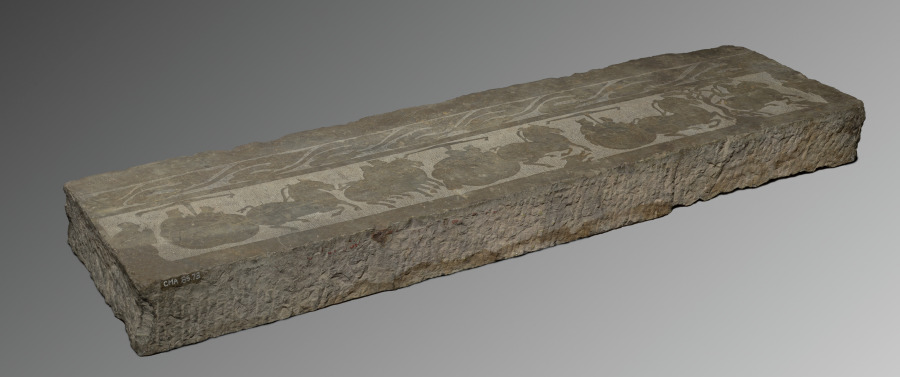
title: Frieze Fragment with Chariot Procession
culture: China, style of Wu Family Shrines, Jiaxiang district, Shandong province, Eastern Han dynasty (25–220 CE)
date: 100s CE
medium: stone carved in low relief with engraved detail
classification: Sculpture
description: The frieze shows a procession of horse-drawn chariots passing through terrain animated with wild animals and a monkey climbing a tree. The border of swirling clouds above conveys associations with heaven or the remote land of immortals in the high mountains. Comparable in style with the stone reliefs of the Wu Family shrines, this stone may have been originally carved for a local Eastern Han dynasty family tomb of similar status. To take a rubbing of the frieze, a moistened sheet of paper is laid over the slab and tamped with an ink pad that then darkens the raised areas, leaving concave sections and incised lines blank.